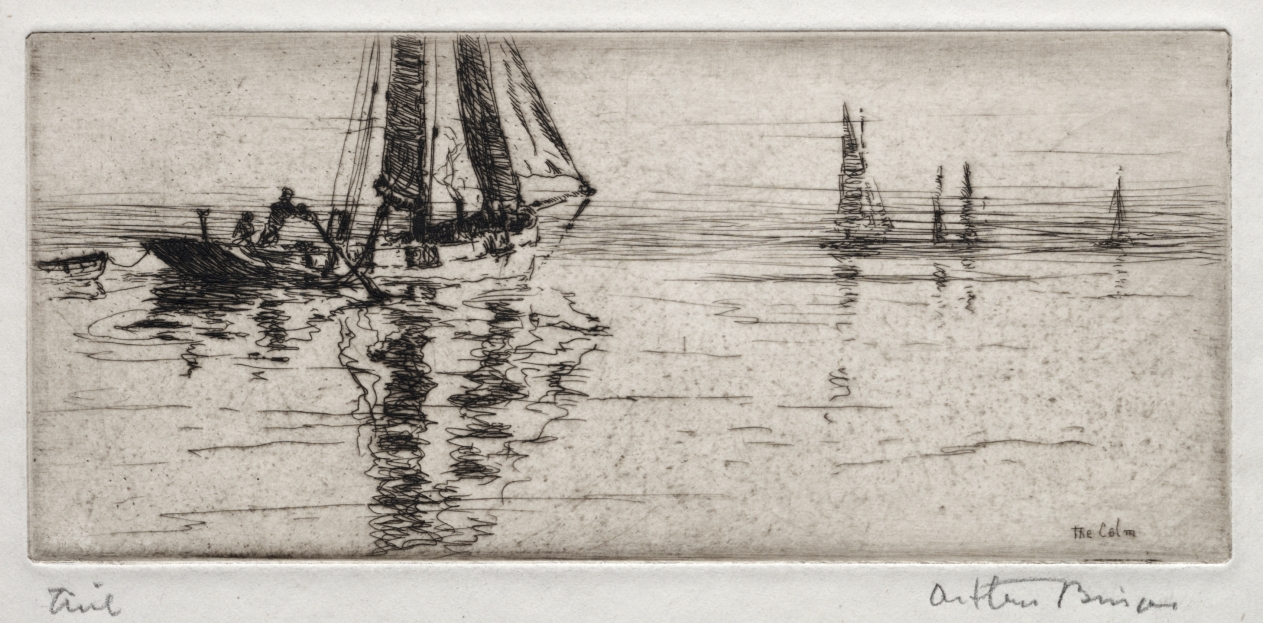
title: The Calm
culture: England, 20th century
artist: Arthur John Trevor Briscoe (British, 1873–1943)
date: 1925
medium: etching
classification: Print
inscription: Lower margin, in graphite: trial Arthur Briscoe